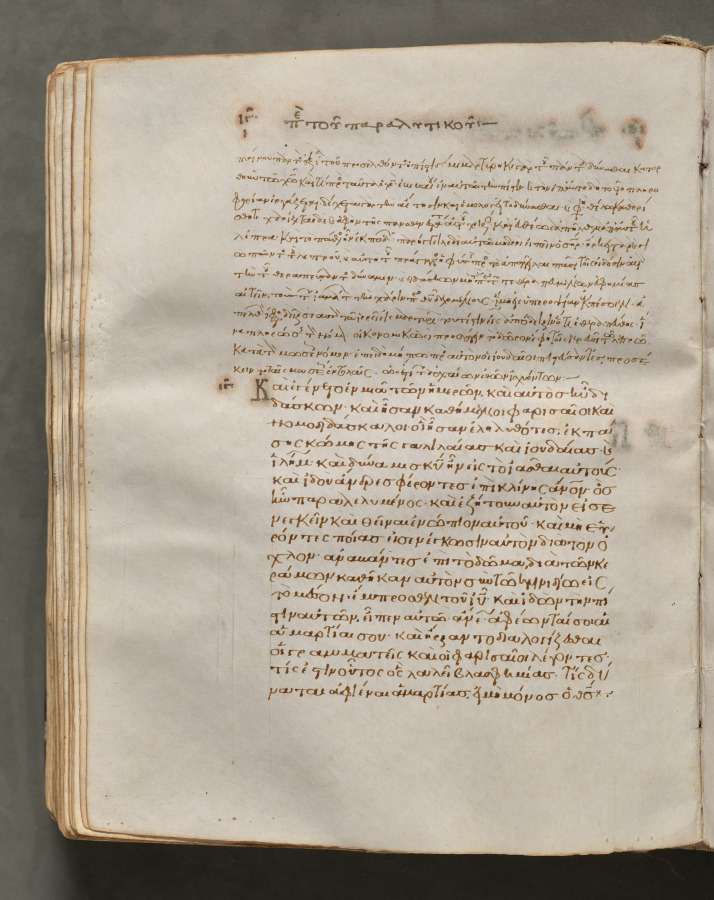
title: Text, folio 223 (verso), from a Gospel Book with Commentaries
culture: Byzantium, Constantinople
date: c. 1000–1100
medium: ink, tempera, and gold on vellum; leather binding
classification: Bound Volume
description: Each of the four gospels in this book opens on a page with brilliantly illuminated borders depicting the author of the text as well as birds-principally peacocks, symbols of the immortality of the soul-and fountains, representing the fountain of life and the salvation of the soul. This volume consists of 428 leaves with texts in Greek. Its level of sophistication suggests that it was probably written and decorated in a monastery in Constantinople.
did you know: Gospel Books were carried in procession through Byzantine churches.